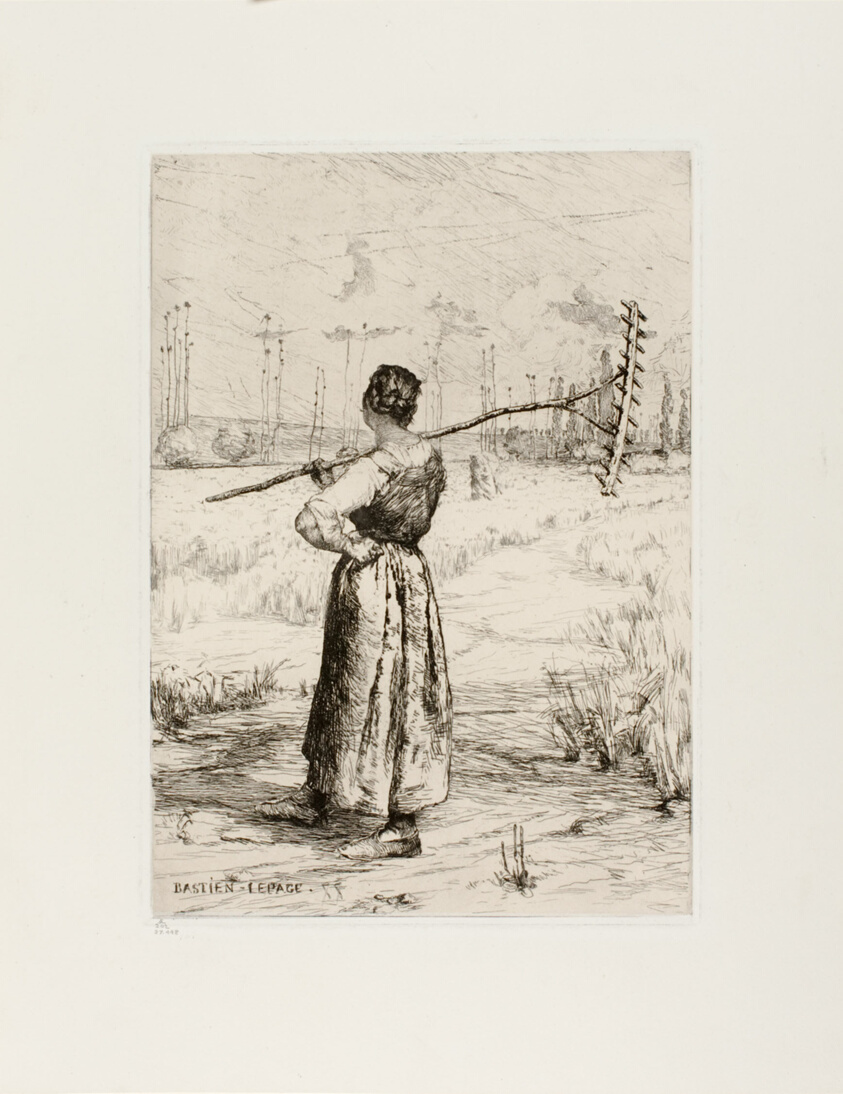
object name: Print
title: The Return from the Field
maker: Jules Bastien-Lepage (French, 1848-1884)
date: 1878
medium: Etching on ivory China paper laid down on heavy white wove paper (China paper collé)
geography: France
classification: etching; print; prints and drawing